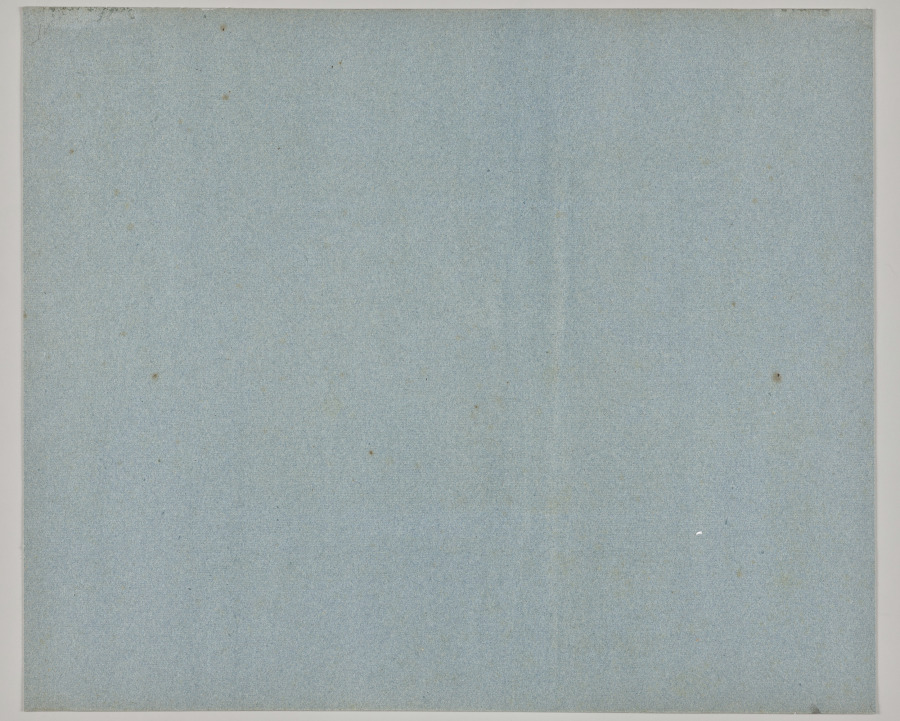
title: Tuesday. Bergveste Salzburg from the Midday Side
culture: Germany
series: Seven Areas from Salzburg and Berchtesgaden. Arranged according to the seven days of the week, connected by two allegorical sheets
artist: Ferdinand Olivier (German, 1785–1841)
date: 1818–23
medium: lithograph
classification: Print